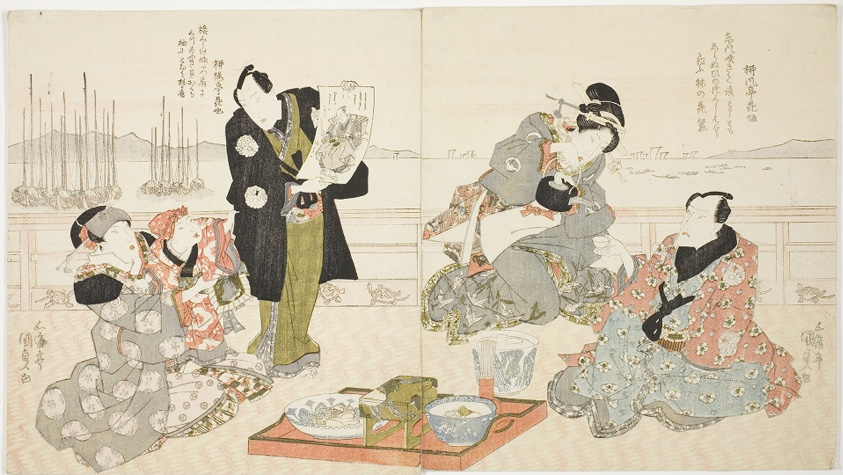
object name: Print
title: The actors Onoe Kikugoro III, Onoe Matsutake III, and Iwai Kumesaburo II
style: Japanese (culture or style)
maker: Utagawa Kunisada I (Toyokuni III) (Japanese, 1786-1864)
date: c. 1825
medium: Color woodblock print; shikishiban diptych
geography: Japan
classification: woodblock print; print; asian art